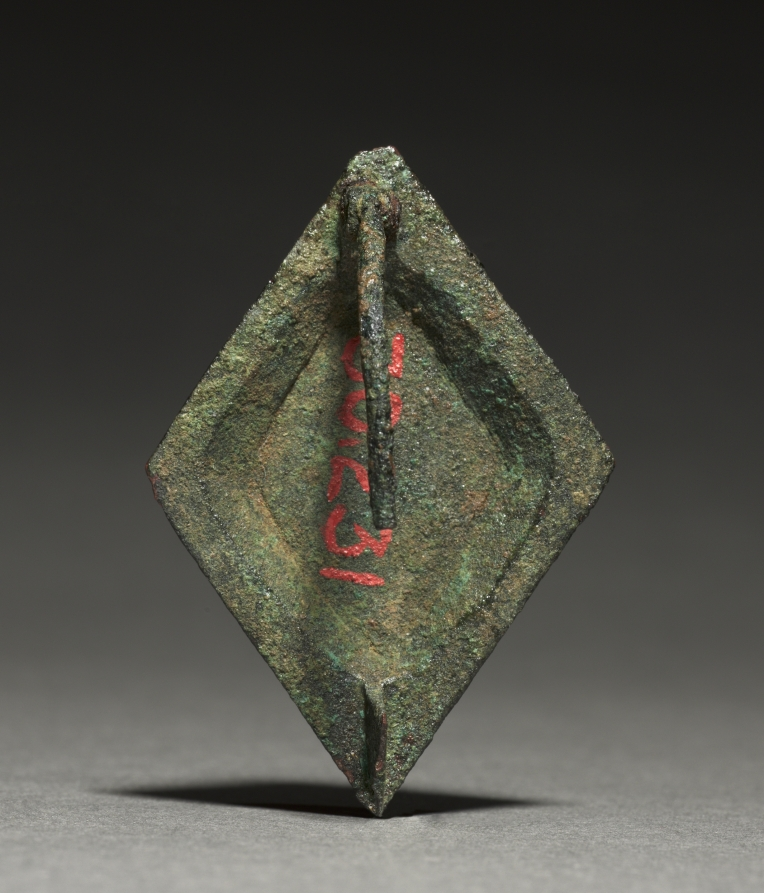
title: Ornamental Brooch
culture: Gallo-Roman or Romano-British, Migration period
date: c. 100–300 CE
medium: bronze and champlevé enamel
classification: Jewelry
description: These brooches functioned as garment clasps (much like the generally larger fibulae) and are distinctive for their decorative enamels. The art of enameling was highly popular among the conquered peoples who lived on the outskirts of the Roman empire, chiefly the Celts and the Gauls. Though the enameling technique was practiced by the Romans themselves on small objects, the brightly colored decoration readily appealed to "barbarian" taste. By the AD 200s, enameled brooches like these were being made in abundance by the native peoples of Britain and Gaul (modern France and Belgium).